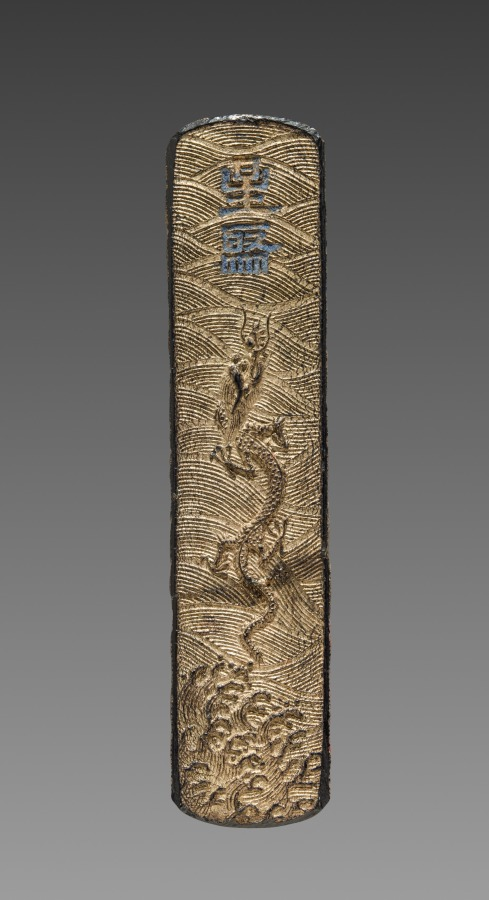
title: Ink Cake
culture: China, Qing dynasty (1644-1911)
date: 19th Century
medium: ink cake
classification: Miscellaneous